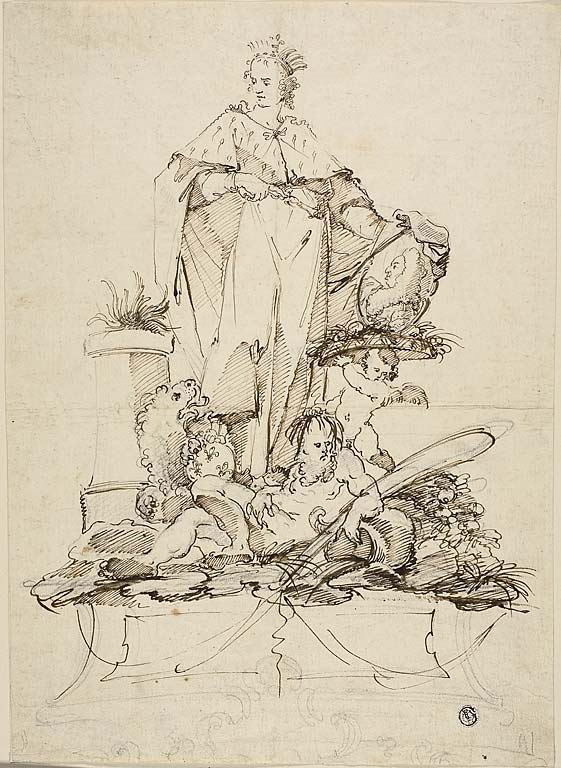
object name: Drawing and Watercolor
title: Allegory in Honor of Grand Duke Gian-Gastone de' Medici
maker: Unknown; (possibly French, early 18th-century)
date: c. 1700-1740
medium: Pen and brown ink, with traces of brush and brown ink, over black chalk on ivory laid paper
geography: Italy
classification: pen and ink drawings; drawings (visual works); prints and drawing